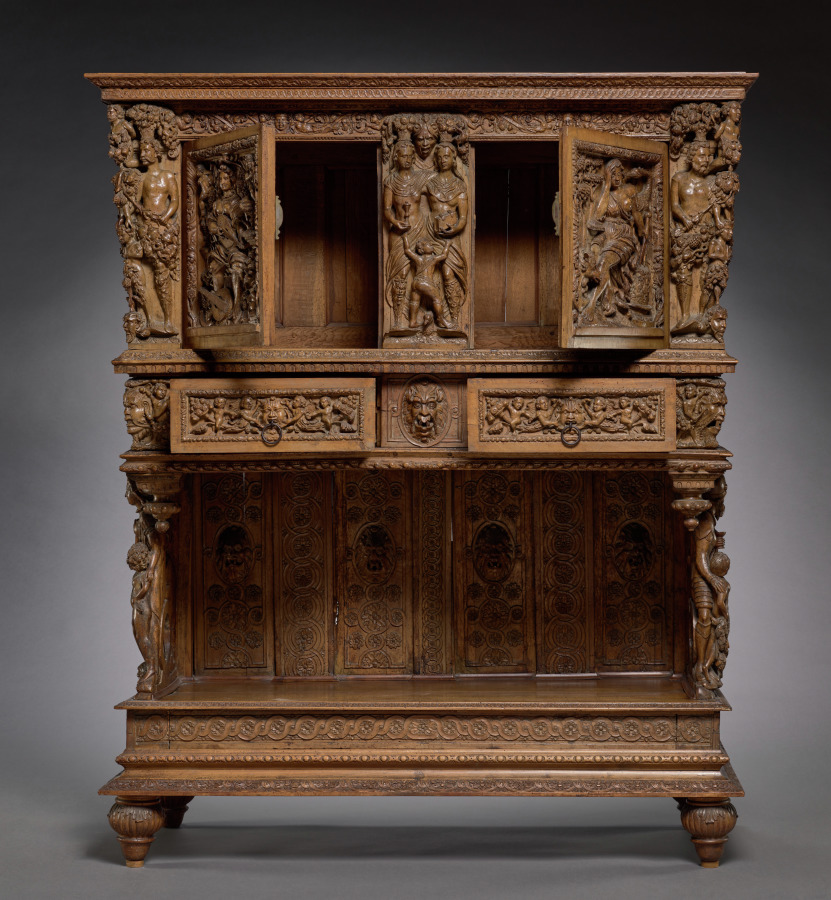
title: Dressoir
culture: France, Burgundy, 16th century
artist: style of Hugues Sambin (French, 1518–c. 1601)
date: mid 1500s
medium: walnut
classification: Furniture and woodwork